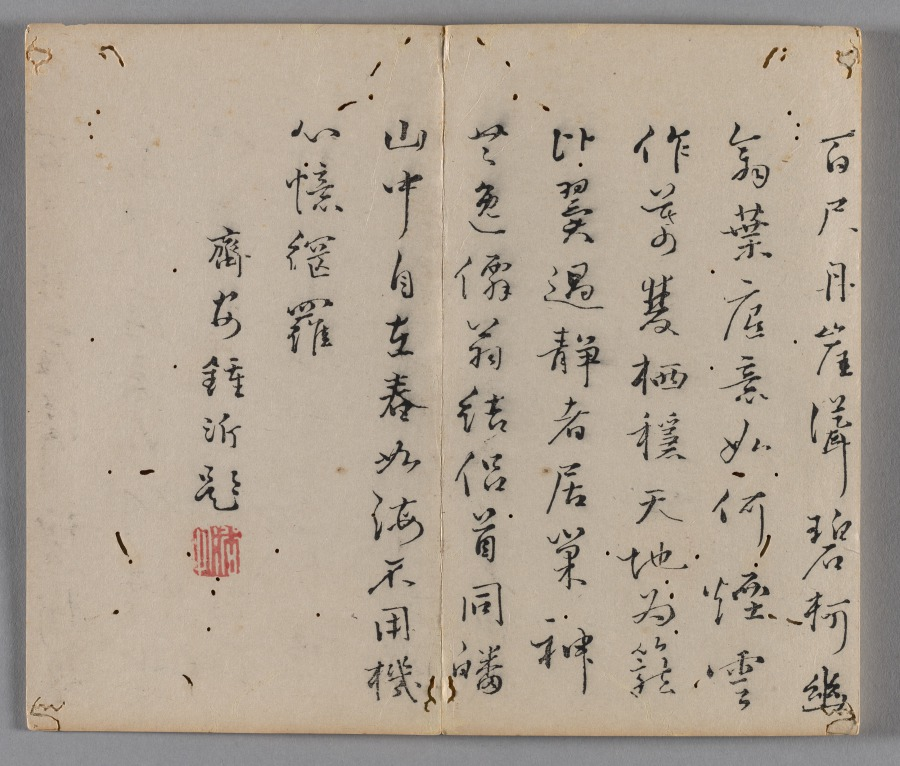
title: Ten Bamboo Studio Painting and Calligraphy Handbook (Shizhuzhai shuhua pu): Birds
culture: China, Qing dynasty (1644-1911)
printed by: Hu Zhengyan (Chinese, c. 1584–1674)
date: 1633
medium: Woodblock-printed book; ink and colors on paper; first edition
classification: Print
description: Color printing reached a level of perfection in the early 1600s, as seen in this Ten Bamboo Studio Collection of Calligraphy and Painting and the Mustard Seed Garden Manual of Painting (printed 1679 and 1701). The painterly quality, precision in registering (aligning) the woodblocks, and harmonious colors made them the most successful color print editions in Chinese history. Both editions were printed and compiled in Nanjing, spread nationwide, and had a great impact on the arts in Japan and Korea.